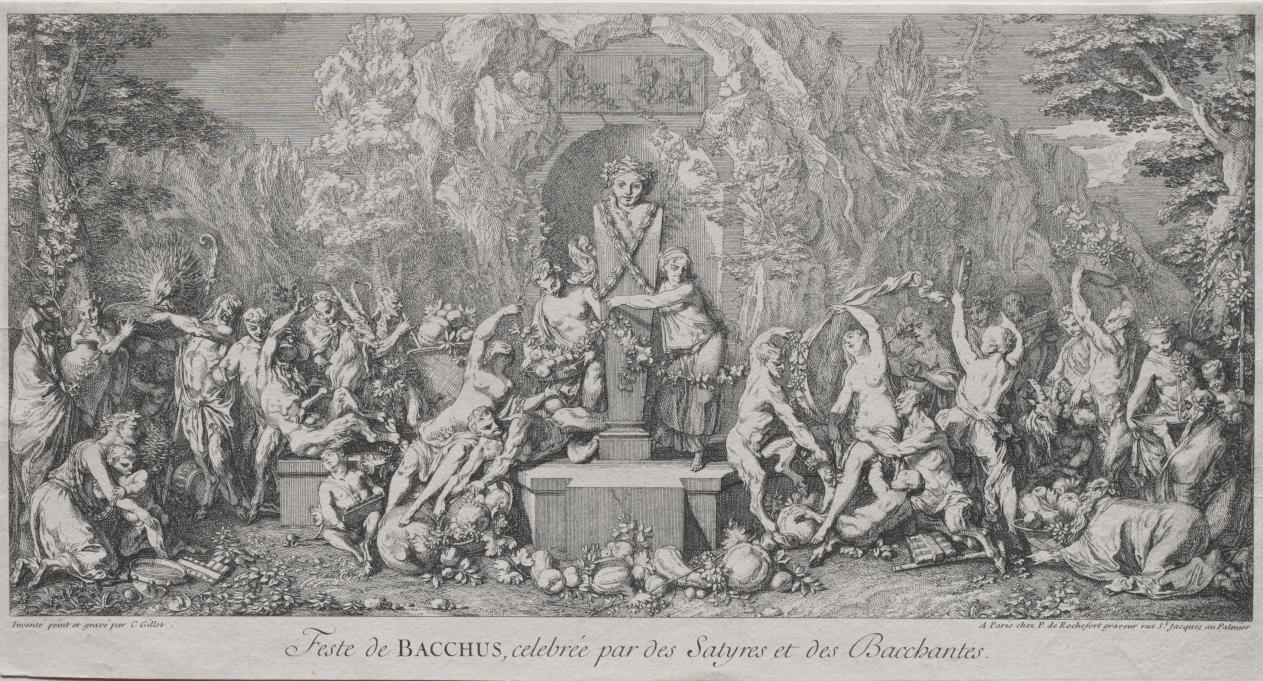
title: The Four Festivals: Festival of Bacchus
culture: France, 18th century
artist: Claude Gillot (French, 1673–1722)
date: c. 1693–1715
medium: etching and engraving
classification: Print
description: The principal source of inspiration for Claude Gillot, while working in Paris during the final years of the reign of Louis XIV (r. 1643–1715), was popular theater. His staged and precisely choreographed bacchanalia scene consists of music, dancing bacchants, drinking, and plentiful food, all symmetrically composed around a herm (a stone pillar topped by the head of Bacchus). According to written sources in Gillot’s time, a herm marked a site in ancient Greece where rites to Bacchus occurred. At the far right, a young satyr holds a thyrsus—a wand decorated with grape leaves and ivy—a bacchanalian symbol of fertility and hedonism.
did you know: The lovely bacchantes (female followers of Bacchus) dancing throughout the composition appear in contrast with the beastly satyrs and fauns. The term bacchante could also be used to describe an intoxicated and libidinous woman in less mythological contexts.